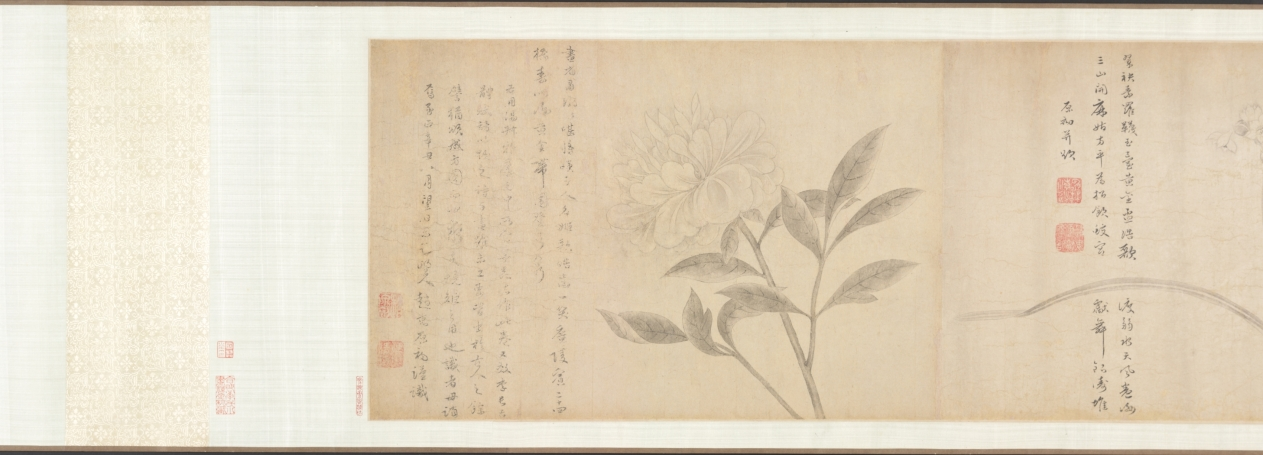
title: Ink Flowers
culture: China, Yuan dynasty (1271-1368)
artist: Zhao Zhong (Chinese, second half of the 1300s)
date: 1361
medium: Handscroll; ink on paper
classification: Painting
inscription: 寶帶同心結，香羅合歡扇。/ 繡作錦鴛鴦，雙雙為君獻。/ 薔薇露灑熏籠衣，馨香奉君君勿違。 原初并題。 [印] 趙衷原初畫記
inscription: 翠袂素羅韈，玉臺黃金盃。浩歌渡弱水。天風卷海三山開，麻姑方平為招飲，蛟宮獻舞銀濤堆。 原初并題。 [印] 雲林清趣、[印] 趙衷原初畫記。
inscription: 右用湯叔雅慶元中所寫墨花法作此卷，又效李長吉體賦詩以題之。詩與畫雖未工，要皆出於古人之餘，譬猶欲成方圓而必求其規矩之用也，識者毋誚焉！至正辛丑八月望日，東吳野人趙衷原初謹識。 [印] 趙原初、[印] 傳世清玩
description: Zhao Zhong's flowers, each paired with a poem, echo the fine-style colored flowers of the academic tradition, but instead he used only ink. Fine lines define the contours of each plant, as well as the veins within each petal and leaf. Careful ink washes give subtle modeling to the forms. The combination of lily, narcissus, and peony is unusual as the three belong to no known seasonal or symbolic system popular in the fourteenth century. Zhao’s medical training may have influenced the selection. Powdered lilies, for example, were prescribed to dispel grief, while the bark of tree peony roots was used as a treatment for various blood disorders.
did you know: This handscroll is a very rare example of ink flowers in the linear baimiao style of the fourteenth century.